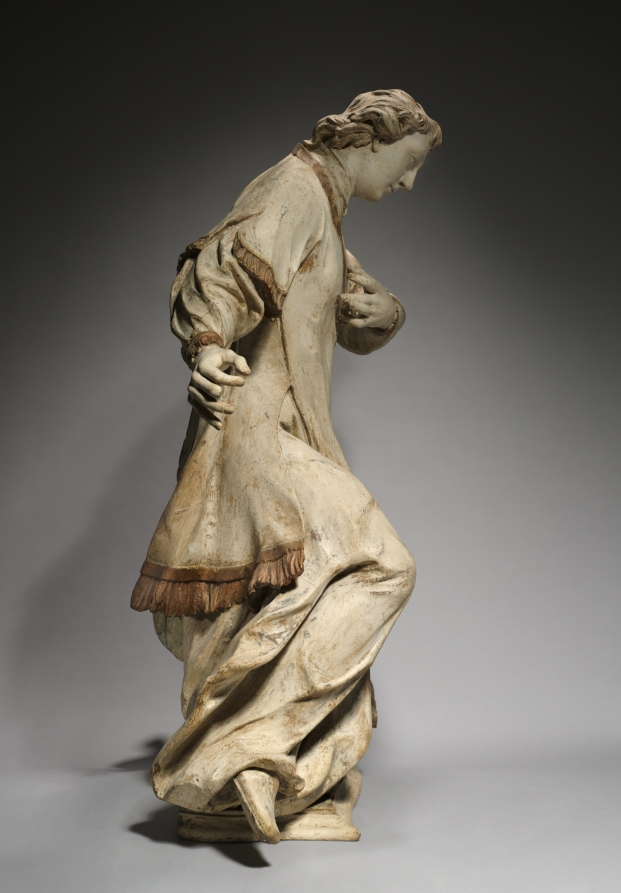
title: Kneeling Saint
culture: Germany, Munich, second half 18th century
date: 1750–1800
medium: painted and gilded wood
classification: Sculpture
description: This serene figure would originally have been part of a larger group, perhaps shown kneeling in adoration of Christ or the Virgin. He wears a knee-length dalmatic, the ecclesiastical dress of deacons (ordained ministers in the Catholic Church). Saints Lawrence and Stephen were among the most popular deacon saints, but lacking an identifying attribute—probably once attached to the saint’s outstretched hand—it is not possible to associate this figure with a specific saint.